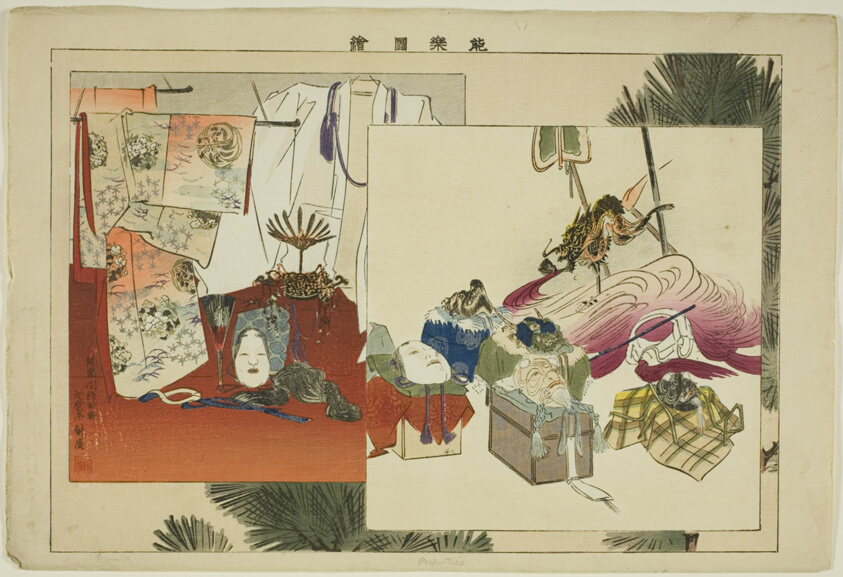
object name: Print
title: Properties, from the series "Pictures of No Performances (Nogaku Zue)"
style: Japanese (culture or style)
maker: Tsukioka Kogyo; Japanese, 1869-1927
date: 1898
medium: Color woodblock print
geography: Japan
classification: woodblock print; print; asian art